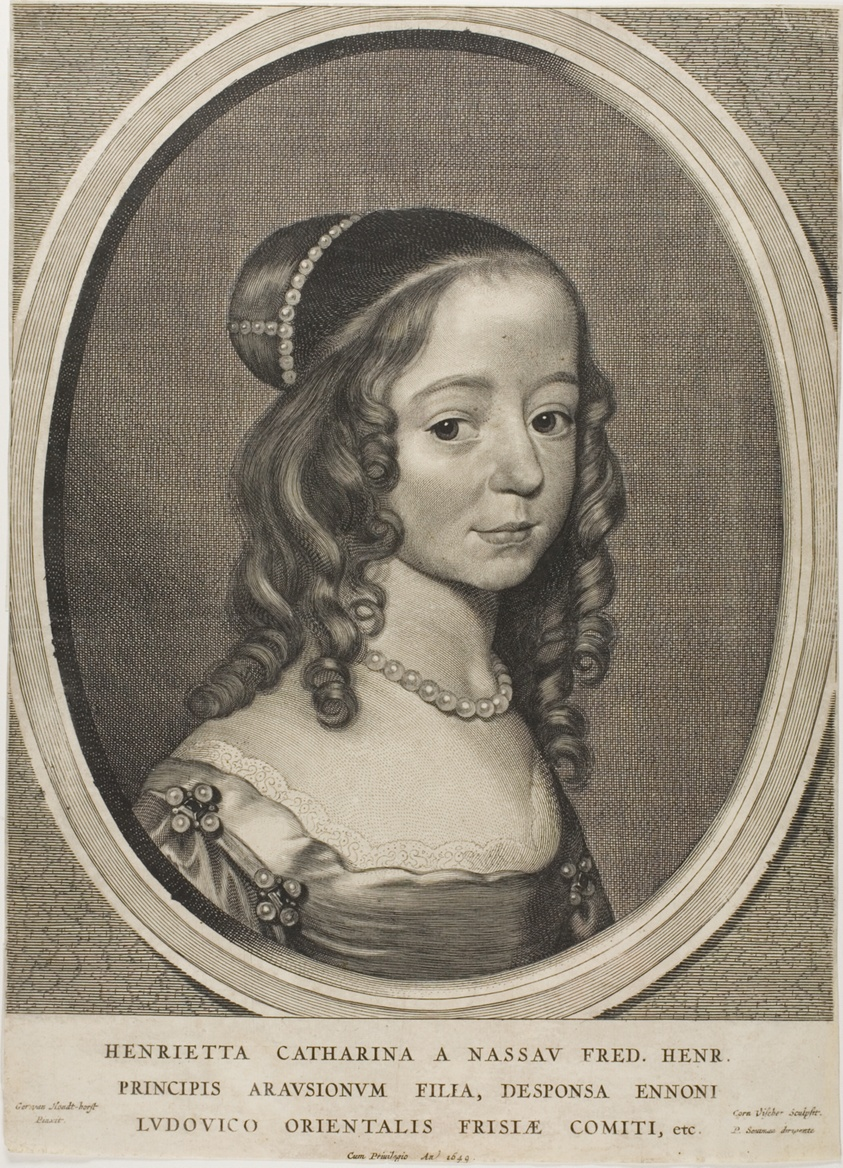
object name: Print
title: Henrietta Catharina, Princess of Orange Nassau, from Nine Portraits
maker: Cornelis Visscher (Dutch, c. 1629-1658); after Gerrit van Honthorst (Dutch, 1590-1656)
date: 1649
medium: Engraving on paper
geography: Holland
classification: engraving; print; prints and drawing